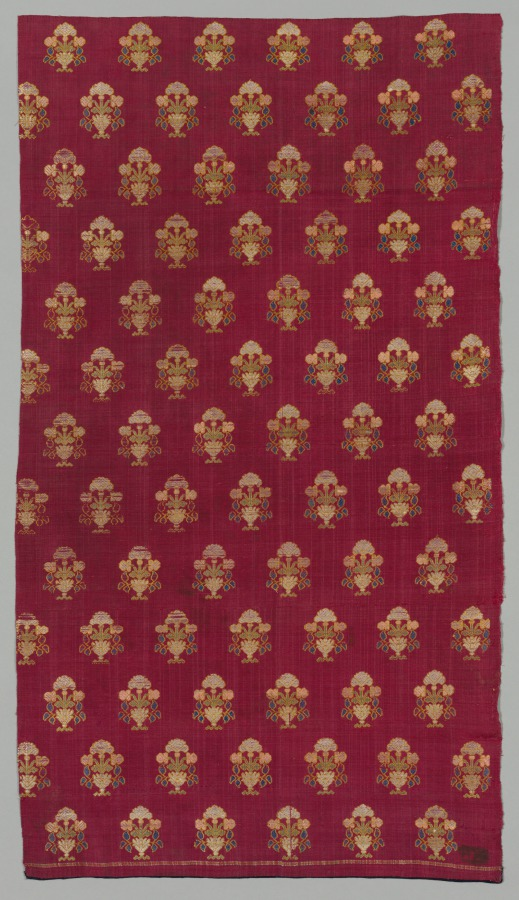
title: Brocade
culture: India, Surat, 18th or 19th century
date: 1700s or 1800s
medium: brocade, "himru"; silk and cotton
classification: Textile